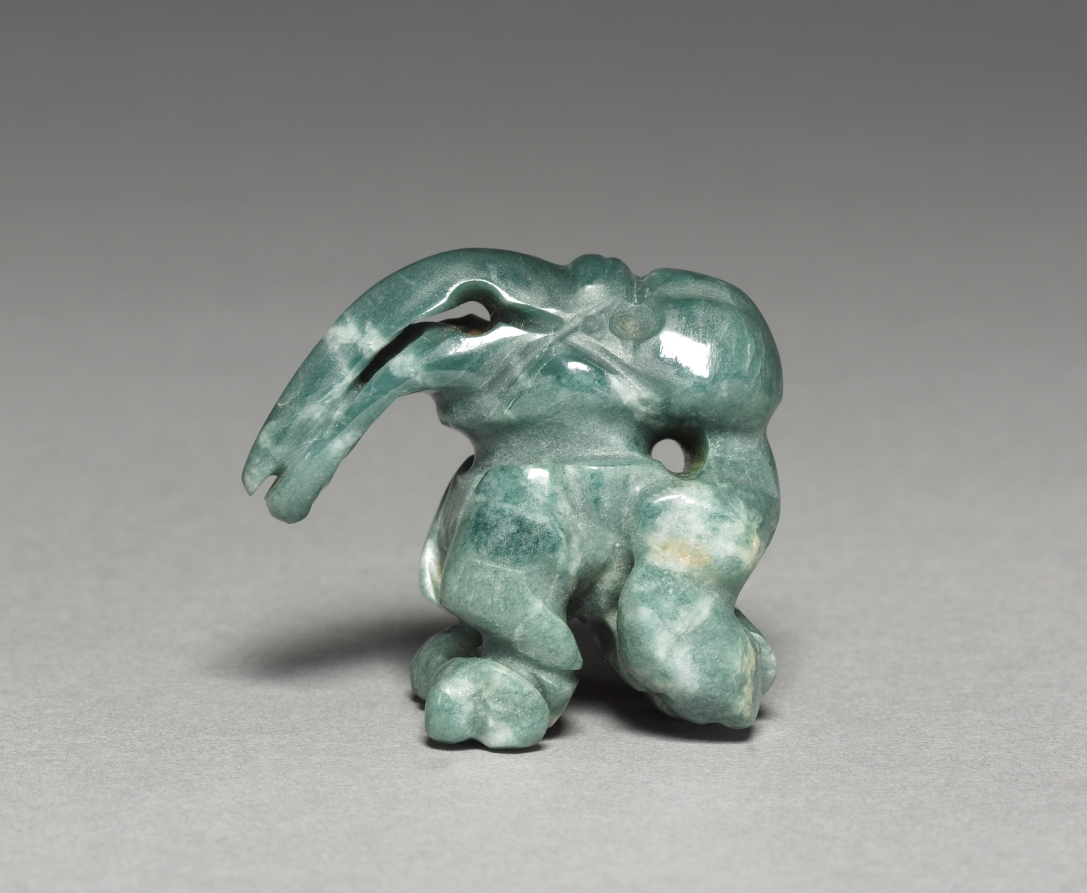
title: Bird Pendant (Buzzard or Vulture?)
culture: Costa Rica, Atlantic Watershed region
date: c. 300 BCE–600 CE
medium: jadeite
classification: Jewelry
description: Before about AD 500, when gold-working technologies were adopted in Costa Rica, jade was the quintessential luxury material and it was masterfully carved into exquisite ornaments of many kinds. Ancient Americans did not use many metal tools, and artists carved jade, a tough stone, with implements of stone, bone, bamboo, or reed.